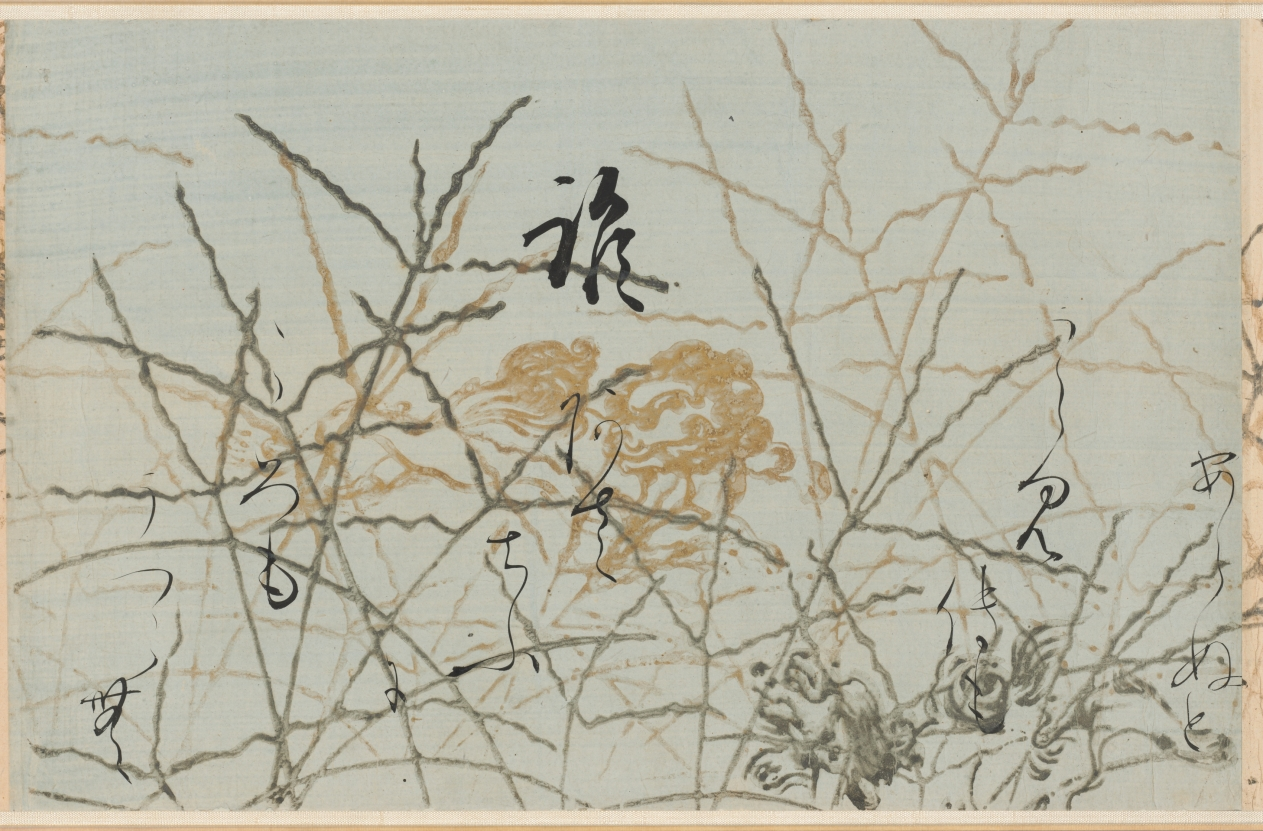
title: Selections from the New Collection of Japanese Poems from Ancient and Modern Times (Shinkokin wakashū) with Printed Designs of Chinese Lions and Crab Finger Grass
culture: Japan, Edo period (1615–1868)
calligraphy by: Hon'ami Kōetsu (Japanese, 1558–1637)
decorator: Tawaraya Sōtatsu (Japanese, c. 1570–c. 1640)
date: early 1600s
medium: handscroll; ink, gold, and silver on paper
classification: Calligraphy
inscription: Seal: 光悦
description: Hon’ami Kōetsu was a calligrapher and craftsman who frequently collaborated with the painter Tawaraya Sōtatsu, considered the first master of the Rinpa school. Kōetsu brushed seven poems from the autumn section of a poetry anthology onto dyed paper with motifs designed and printed in gold and silver by Sōtatsu.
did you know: Before becoming a master painter of screens, Tawaraya Sōtatsu painted fans.